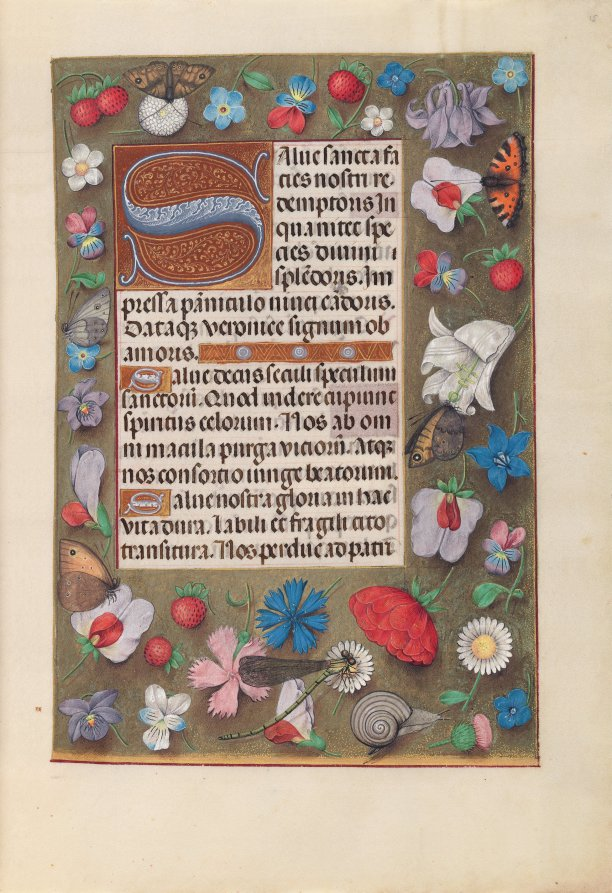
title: Hours of Queen Isabella the Catholic, Queen of Spain: Fol. 15r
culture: Flanders, Ghent and Bruges, late 15th century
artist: Master of the First Prayerbook of Maximillian (Flemish, c. 1444–1519)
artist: and Associates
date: c. 1500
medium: ink, tempera, and gold on vellum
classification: Bound Volume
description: This manuscript was illuminated by a circle of at least five highly organized manuscript painters active in the Flemish cities of Ghent and Bruges. The principal illuminator was Alexander Bening, who painted the majority of the book's miniatures. Manuscripts produced by this circle of artists are renowned for the decoration of their borders, which typically feature a rich variety of realistically-painted flowers, birds, and butterflies. This prayer book, called a book of hours, was intended not for a cleric, but for the private devotions of a lay person-in this case, Isabella the Catholic, Queen of Spain (1451-1504). Isabella's coat of arms embellishes the book's frontispiece. It is unlikely that the book was commissioned by the Queen herself; rather, she probably received it as a diplomatic gift from someone courting her patronage, perhaps Cardinal Francisco Jimenez de Cisneros. A Franciscan friar, Jimenez was dependent upon Isabella for his advancement, first to the post of Queen's confessor in 1492, and then to Archbishop of Toledo in 1495.